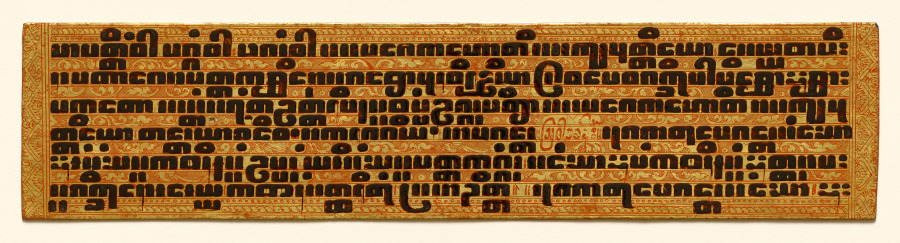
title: Text, folio 8 (recto) from a Kammavacha: Buddhist ordination text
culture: Myanmar (Burma)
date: 1800s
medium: Leaf: lacquer and gilding on cloth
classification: Manuscript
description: In premodern Burma, lay people commissioned lavishly ornamented manuscripts for ceremonial occasions, when officiants would read aloud from the text. Written in black lacquer, the text is in the language of Pali written in a Burmese script. It contains ordination rites and procedures for monastic ceremonies. The second to last page is covered with intricately drawn, winged celestial beings (nats) in gestures of praise. They fly amid intertwining vegetation—denoting bounty—that grows from serpentine forms that refer to rain clouds. Lionlike forms inhabit the space with them. The top and bottom covers are equally ornamented with jeweled floral patterning.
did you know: The Pali text of this manuscript is written in Burmese square script, which is also known as "tamarind seed script."